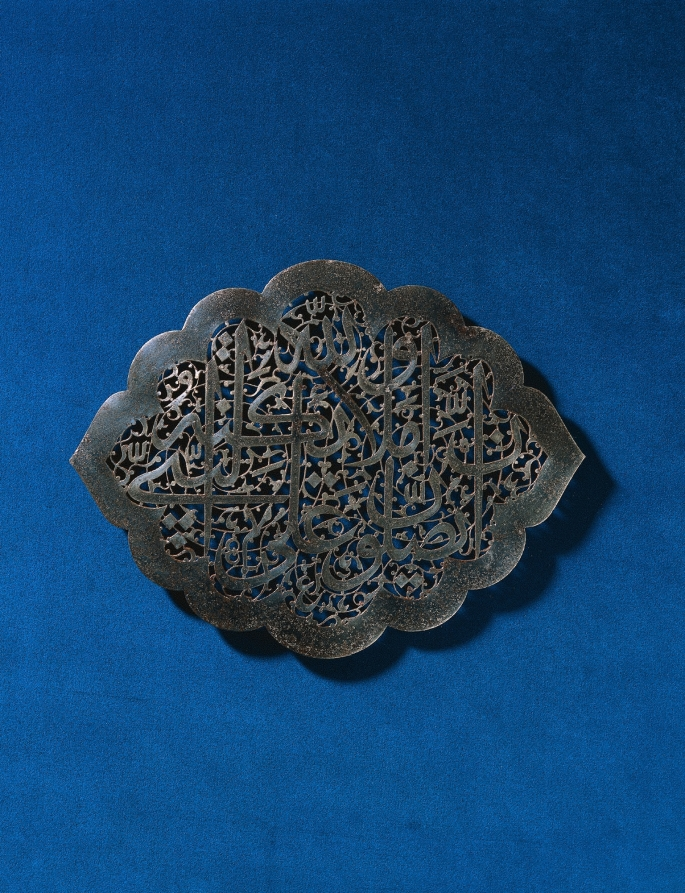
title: Inscription Plaque, Possibly from a Door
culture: Iran, Safavid period (1501–1722)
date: c. 1693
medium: forged steel, cut to shape and pierced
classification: Metalwork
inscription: Muhaqqaq, Qur'an 33:56 'Verily, God and His Angels send blessings on the Prophet'.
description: This pierced steel plaque is said to have adorned the royal tomb of Shah Suleyman II (reigned 1666–93). The Qur’anic inscription reads: “Verily, God and His Angels send blessings on the Prophet” (33:56). Steel plaques of this type required great skill to manufacture. Because of the steel’s tensile strength and durability, artists were able to create elaborate openwork plaques like this one to decorate the doors of mausolea and mosques.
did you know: Calligraphy was the supreme art form in the Islamic world.